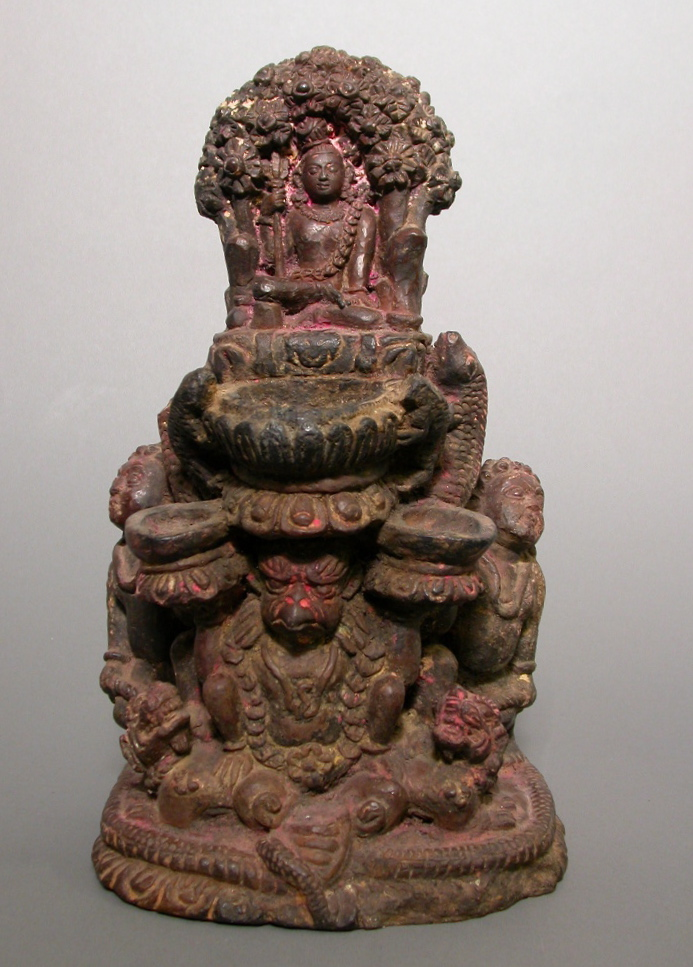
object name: Decorative Arts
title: Lamp with Deified Figure Upheld by Garuda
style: Himalayan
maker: Nepal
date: 15th century or earlier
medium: Terracotta with traces of vermilion pigment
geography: Nepal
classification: earthenware; ceramics; sculpture; asian art; decorative arts